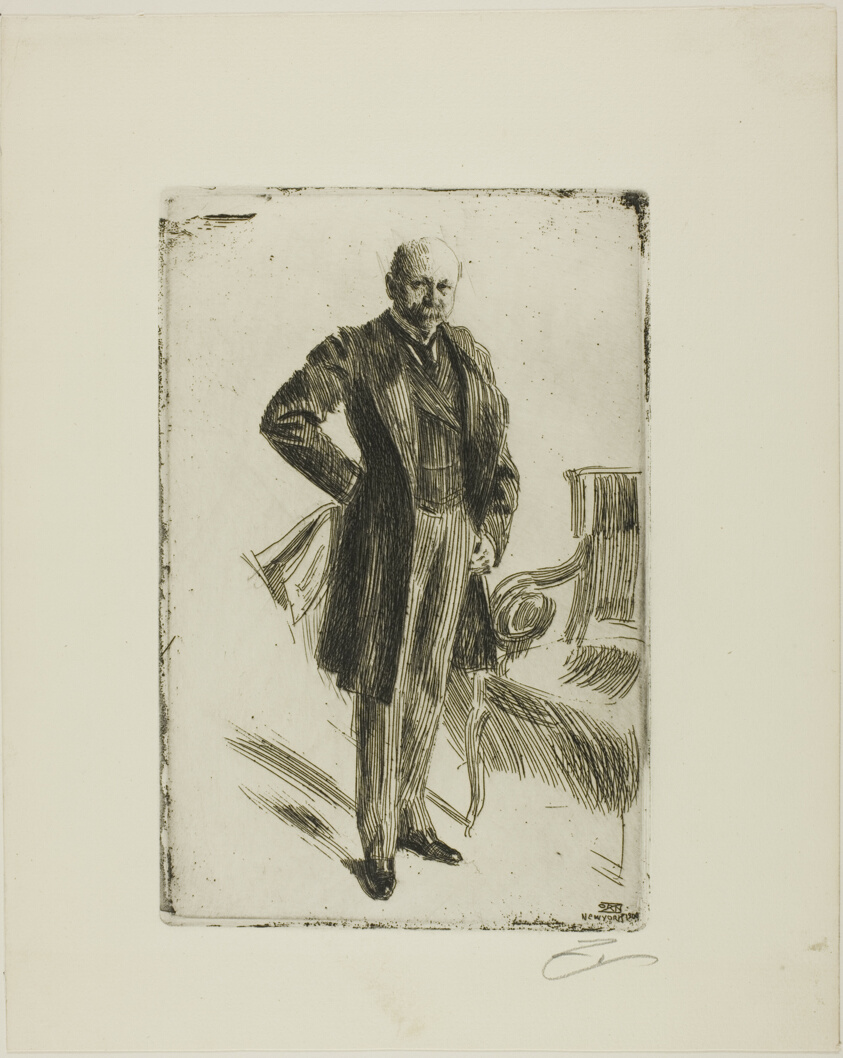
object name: Print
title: Colonel Lamont I (Whole length)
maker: Anders Zorn (Swedish, 1860-1920)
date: 1900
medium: Etching on ivory laid paper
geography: Sweden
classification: etching; print; prints and drawing